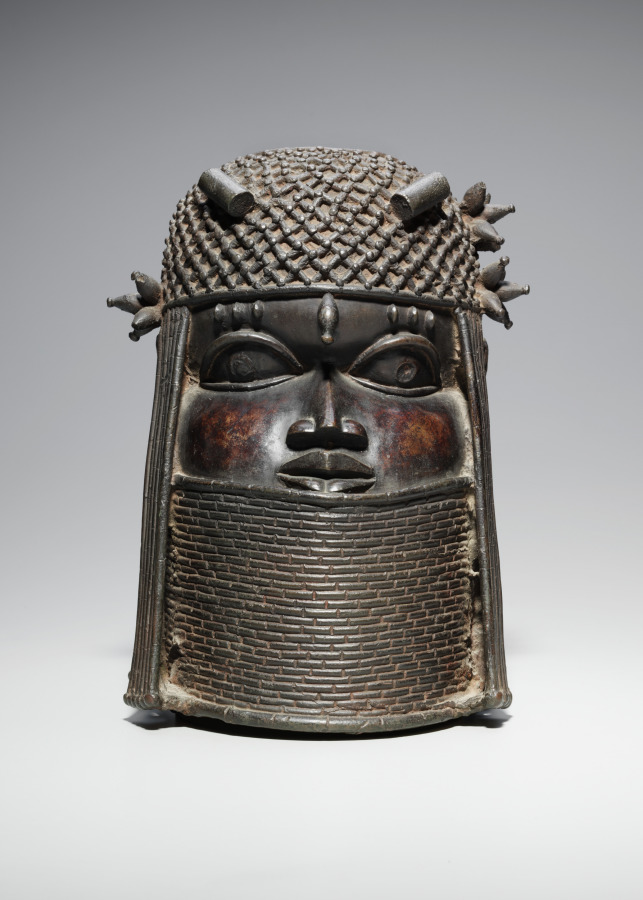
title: Ancestral Commemorative Head (uhunmwun-elao)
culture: Nigeria, Benin Kingdom, Ẹdo peoples, members of the Igun Eronmwon (royal brasscasters) guild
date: possibly mid-1500s or early 1600s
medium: Copper alloy and iron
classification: Sculpture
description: Brass heads are among many objects a new Ọba commissions when dedicating a shrine to their predecessor. This head of an Ọba wears layered necklaces of royal coral beads. Tubular beads adorn both the netted cap and slender braids alongside his temples. While representing an individual, his facial features and calm expression are idealized. The thickly cast head once supported a tusk. Immune to corrosion, brass symbolizes royal permanence. A personal religious object, this head sat on an ancestral altar in the Ọba’s palace. Like many works taken from Benin altars, this contrasts with its present-day public display in an American museum.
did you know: The obas (kings) of the Benin Kingdom still wear coral headpieces and jewelry like this sculpted head depicts.